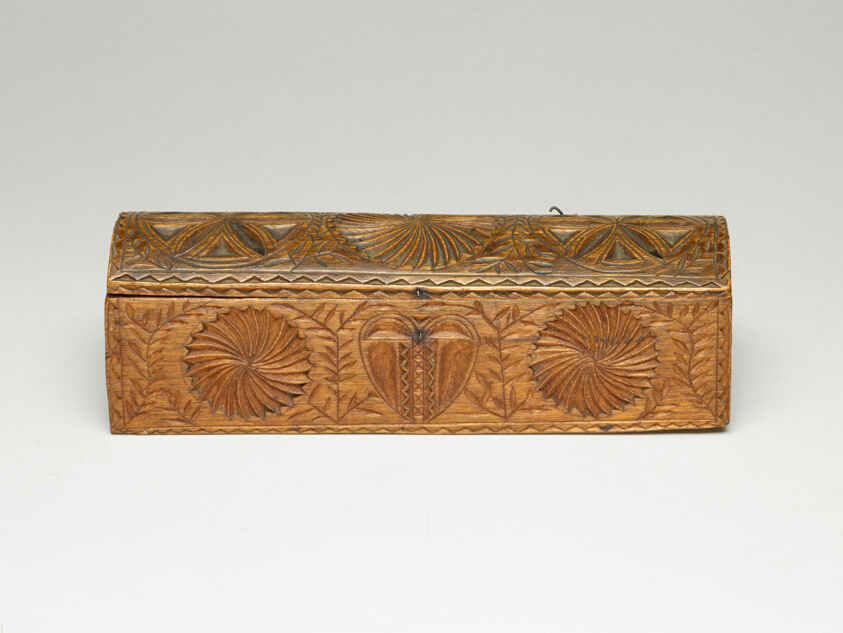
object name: Decorative Arts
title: Box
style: Folk Art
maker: Artist unknown (American, active 18th century)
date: 1789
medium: Wood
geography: United States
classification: case furniture; box; furniture; american decorative arts; american arts; decorative arts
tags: furniture